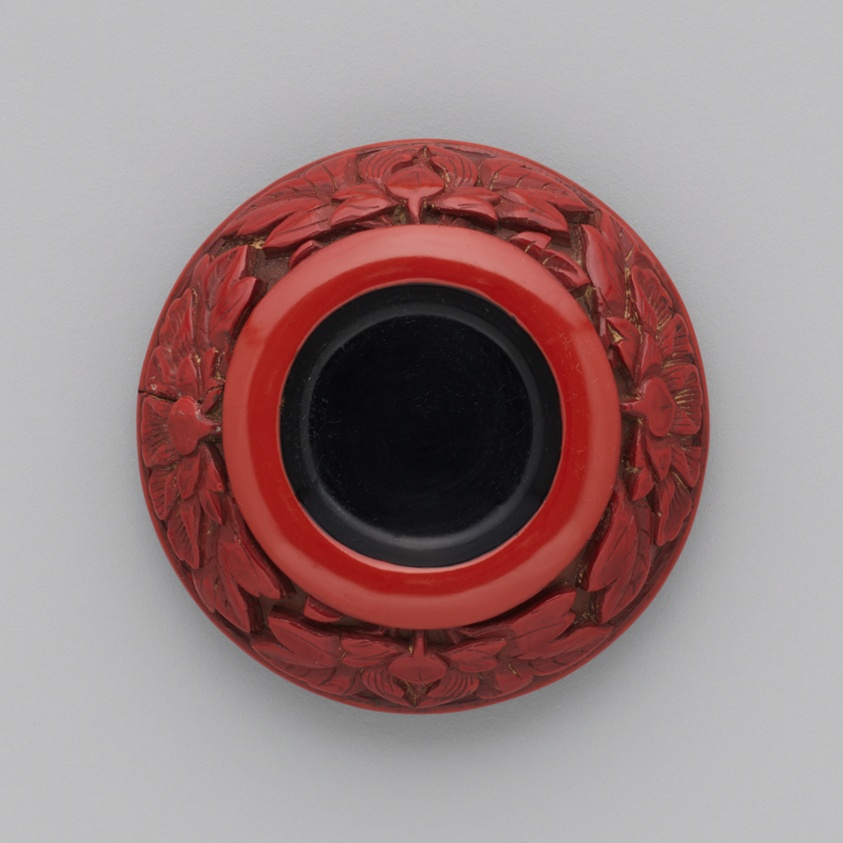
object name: Decorative Arts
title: Seal Paste Box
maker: China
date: Ming Dynasty (1368-1644), 15th century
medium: Carved lacquer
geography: China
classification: lacquer; seal